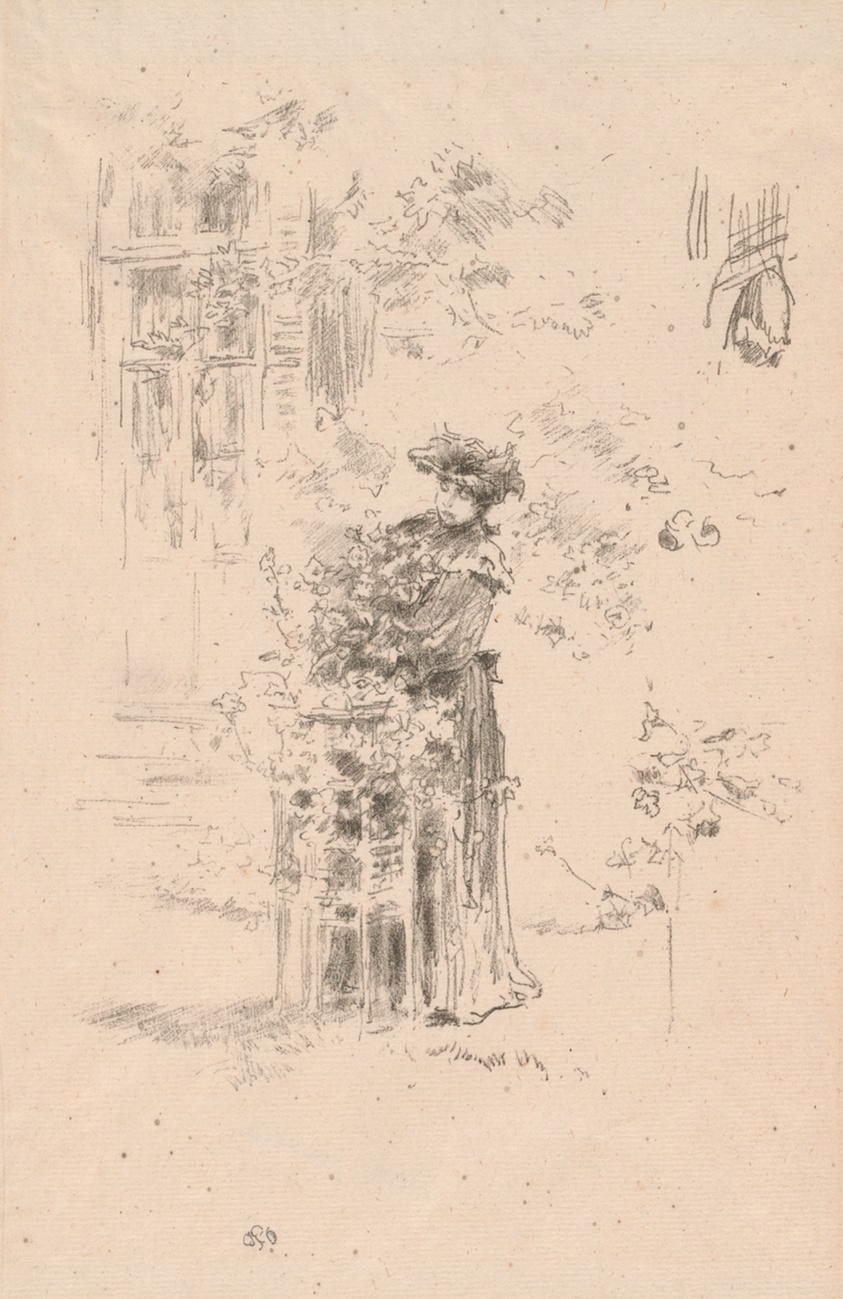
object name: Print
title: La Belle Jardinière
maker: James McNeill Whistler (American, 1834-1903)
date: 1894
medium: Transfer lithograph in black, with stumping and scraping, on cream laid paper, laid down on a heavy backing sheet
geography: United States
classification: transfer lithograph; lithograph; print; prints and drawing; paper